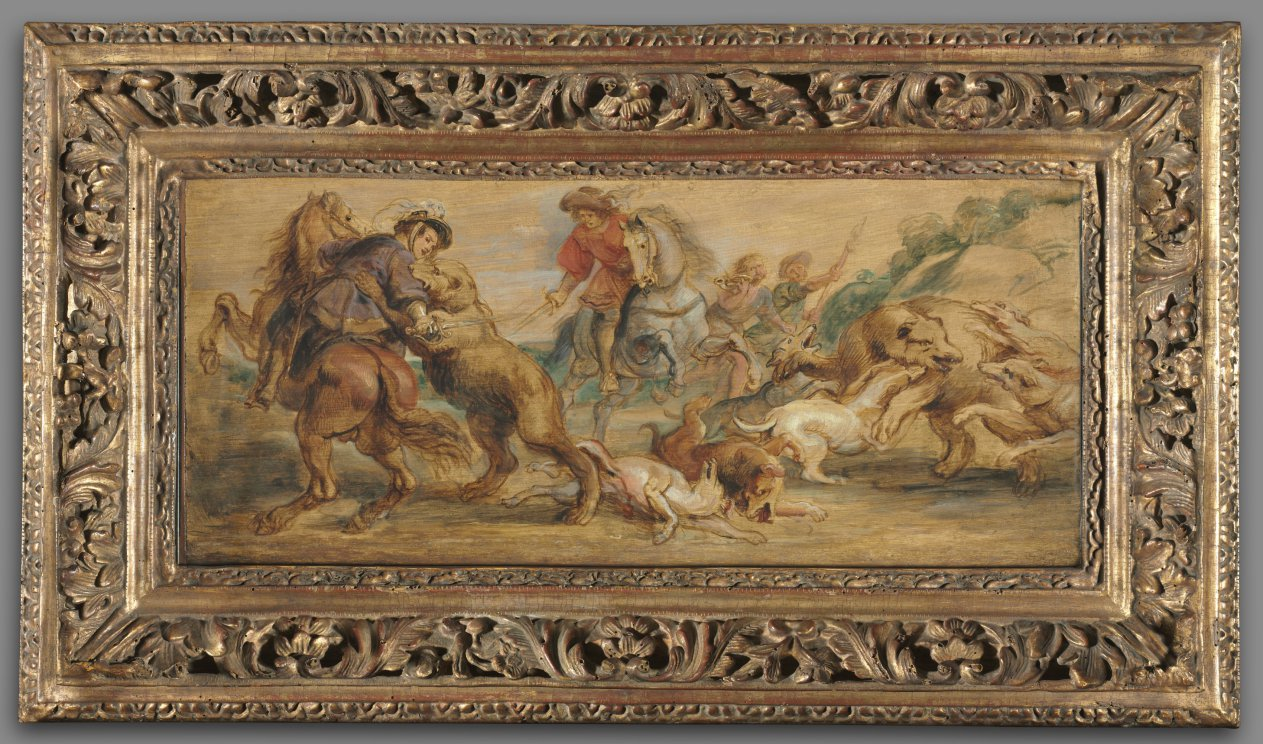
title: Study for "The Bear Hunt" (for the Alcázar, Madrid)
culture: Flanders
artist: Peter Paul Rubens (Flemish, 1577–1640)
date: c. 1639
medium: oil on wood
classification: Painting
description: On June 22, 1639, King Philip IV of Spain received a letter from his younger brother Ferdinand (1609–1641). The letter explained that the artist Peter Paul Rubens had recently completed all of the sketches for a series of paintings that were to hang in the halls of the Alcázar Palace in Madrid. Bear Hunt is one of seven surviving studies out of the original eighteen. In this scene, a bear attacks a hunter and a companion comes to his aide The others work to stave off a second angry bear. The sketch was completed in the last year Rubens's life, and the paintings for the series were never completed.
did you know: With just a few quick brushstrokes, Rubens evokes the energy and drama of a ferocious hunt.